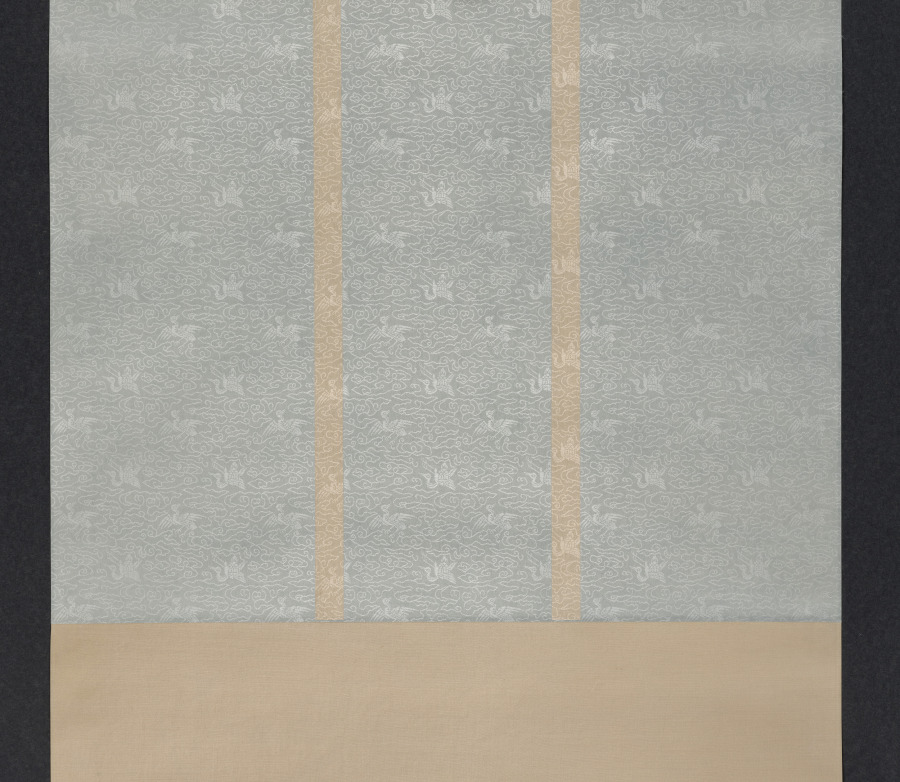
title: Bamboo in the Wind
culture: China, Yuan dynasty (1271-1368)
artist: Puming (Xuechuang) (Chinese, active before 1274-after 1329)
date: 1300s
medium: Hanging scroll; ink on silk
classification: Painting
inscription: Artist's signature and 2 seals, all reading: Xuechuang 雪窓.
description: Bamboo is an evergreen plant that does not break under the weight of snow or the force of the wind, and thus became a favorite motif in literati painting and Chan Buddhism as a metaphor for the virtue of not yielding to worldly temptations. Xuechuang, also known as monk Puming, was a native of Songjiang, near Shanghai, who spent his life as a monk in Suzhou. In 1338, he presided over Yunyan temple on Tiger Hill. Here, he masterfully depicts a bamboo gently bent in a subtle breeze. Puming’s paintings were revered in Japan and Korea.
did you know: Bamboo, pine, and plum, often referred to as the "three friends of winter," are popular motifs in Chinese literati art.